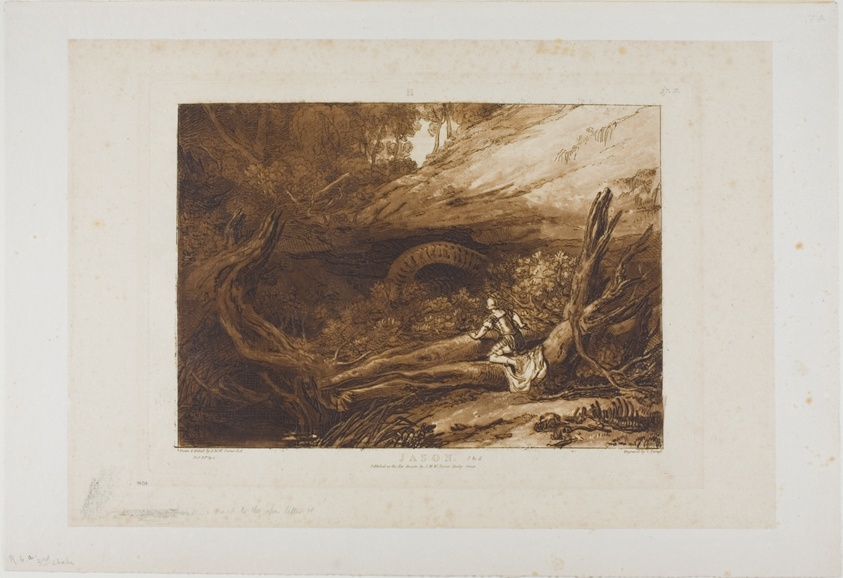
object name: Print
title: Jason, plate 6 from Liber Studiorum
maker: Joseph Mallord William Turner (English, 1775-1851); Engraved by Charles Turner (English, 1773-1857)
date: published 1807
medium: Etching and engraving in brown on ivory paper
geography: England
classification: etching; print; prints and drawing